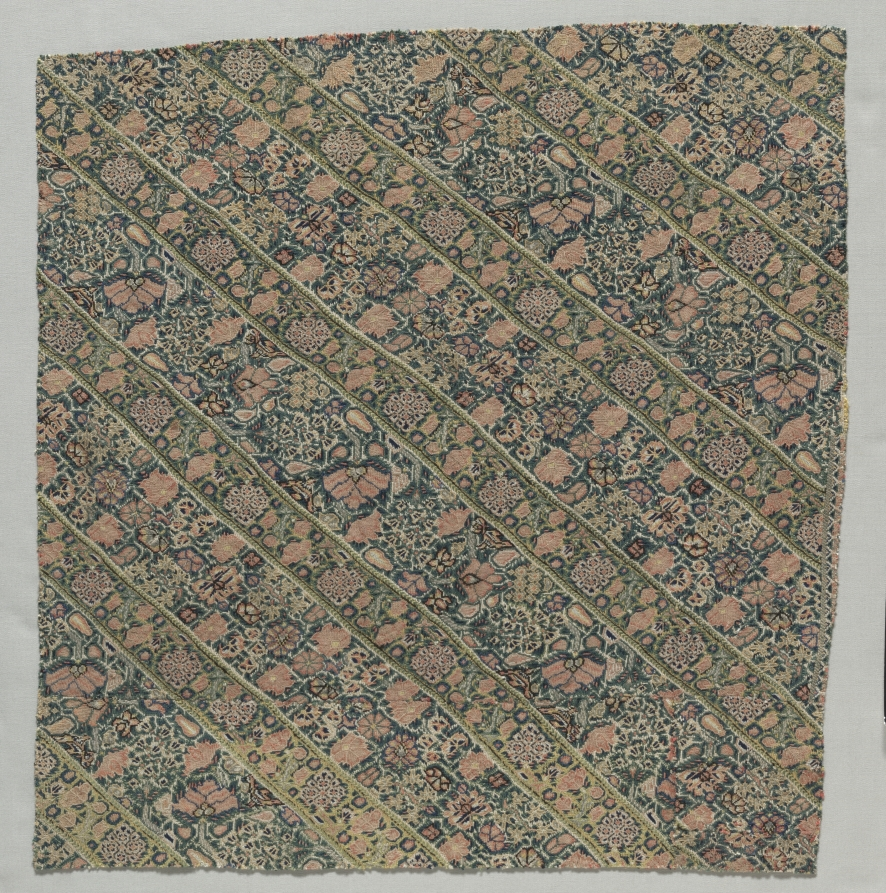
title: Fragment of a "Nakshe" (Woman's Trousering)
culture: Iran, 18th century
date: 1700s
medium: embroidery, silk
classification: Embroidery